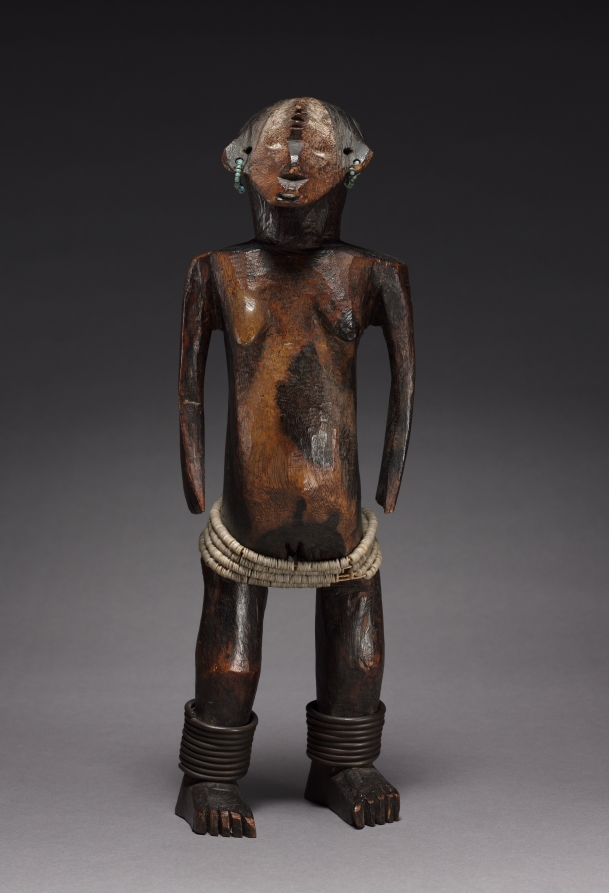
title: Female Figure of a Pair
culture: Africa, Central Africa, Democratic Republic of Congo, probably Ngbandi-style carver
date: late 1800s-early 1900s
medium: Wood, iron alloy, glass beads, plant fiber, and cloth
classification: Sculpture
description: Carving of paired figures is quite well documented among the Ngbandi and its neighbors the Ngbaka-Minagende, where such sculptures are said to represent the mythical ancestor Seto and his sister-wife, Nabo. Field-based research cannot confirm the existence of figurative couples among the Ngbandi.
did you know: Odette Delenne, the collector of this pair, said that these figures reminded her of herself and her husband, René.